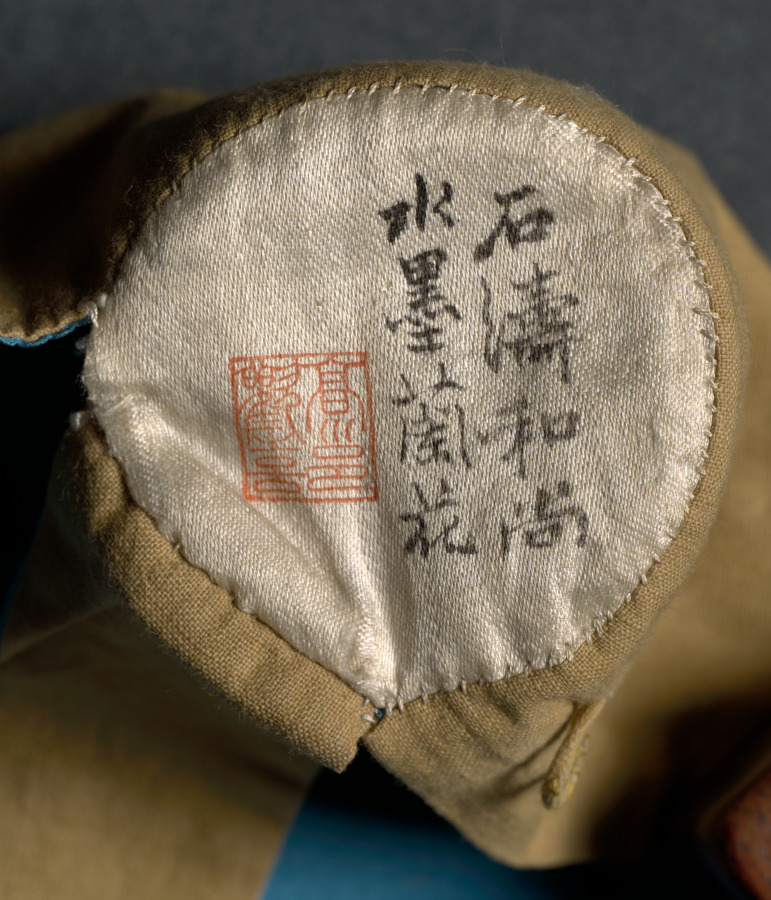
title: Rocks, Orchid, and Bamboo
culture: China, Qing dynasty (1644-1911)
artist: Shitao (Chinese, 1642–1707)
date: 1662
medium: handscroll; ink on paper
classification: Painting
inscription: Title colophon in four characters with signature and two seals on gold-flecked paper.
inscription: Artist's signature, inscription (with date of 1662), five seals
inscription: Colophon with two seals.